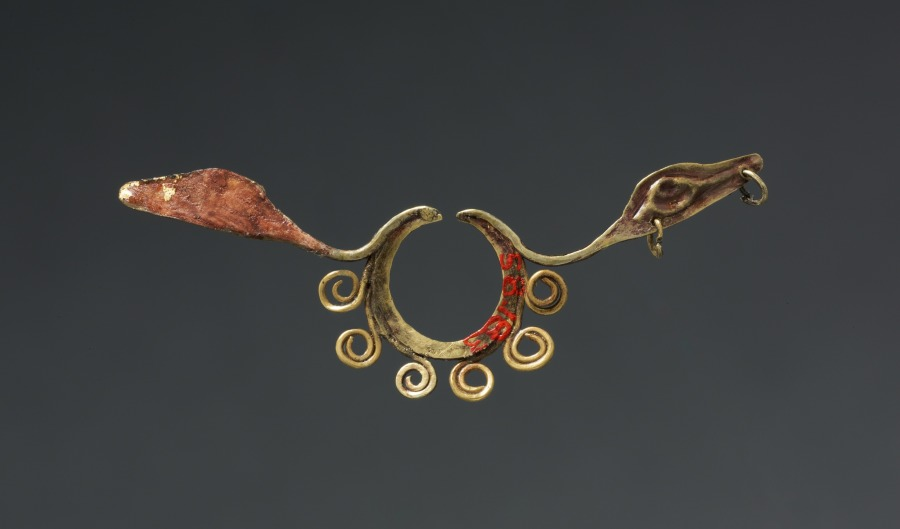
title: Nose Ornament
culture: Peru, North Highlands, Chavín de Huantar(?), Chavín style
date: c. 500–200 BCE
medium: hammered and cut gold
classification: Metalwork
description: There seems to be a link between Chavín religion and appearance of the Andes’ first large precious-metal objects, made using revolutionary new metallurgical processes. Chavín may have developed these technical innovations to express the inexpressible, the "wholly other" nature of its religion. In many areas, elite men and women wore the ornaments as emblems of their ties to this religion, and eventually were buried with them. These 16 objects, along with three others not in the museum’s collection, are said to have come as a group from Chavín itself.